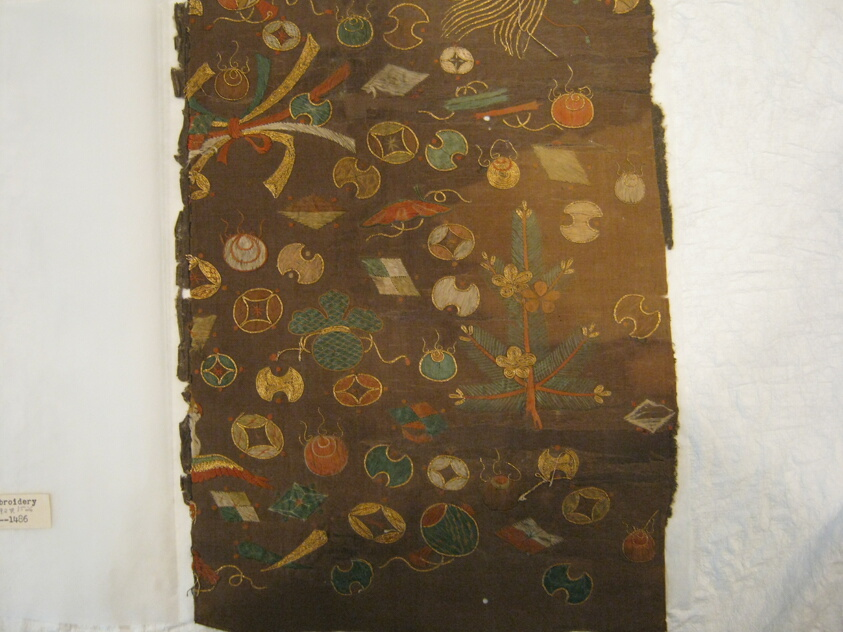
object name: Textile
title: Fragment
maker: Japan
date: 18th century, late Edo period (1789–1868)/ Meiji period (1868–1912)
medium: Plain simple cloth, silk embroidered with floss and gilt paper wound on white linen? core couching and satin stitch.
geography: Japan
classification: textile; needlework (visual works)